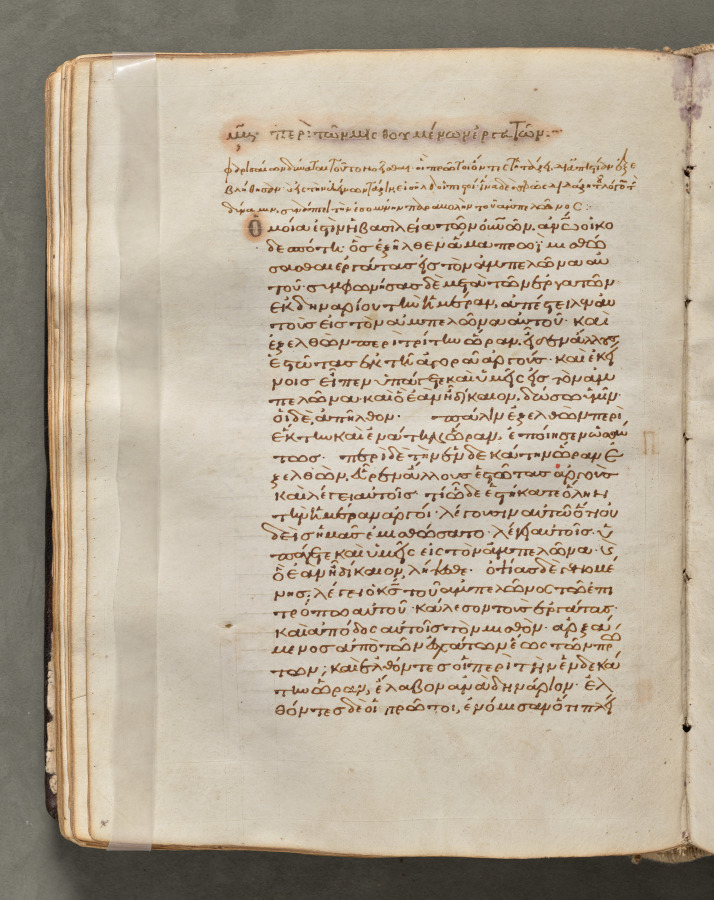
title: Text, folio 87 (verso), from a Gospel Book with Commentaries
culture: Byzantium, Constantinople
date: c. 1000–1100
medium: ink, tempera, and gold on vellum; leather binding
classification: Bound Volume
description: Each of the four gospels in this book opens on a page with brilliantly illuminated borders depicting the author of the text as well as birds-principally peacocks, symbols of the immortality of the soul-and fountains, representing the fountain of life and the salvation of the soul. This volume consists of 428 leaves with texts in Greek. Its level of sophistication suggests that it was probably written and decorated in a monastery in Constantinople.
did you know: Gospel Books were carried in procession through Byzantine churches.